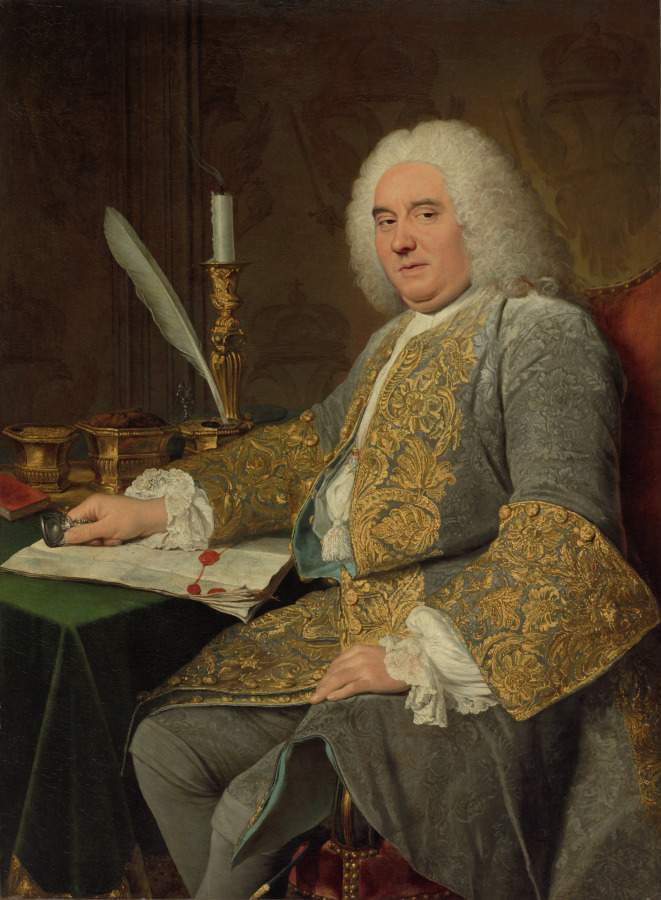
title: Portrait of Jean-Gabriel du Theil at the Signing of the Treaty of Vienna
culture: France, 18th century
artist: Jacques André Joseph Aved (French, 1702–1766)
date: 1738–40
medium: oil on canvas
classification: Painting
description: As secretary of foreign affairs for Louis XV of France, Jean-Gabriel du Theil (1685–1755) helped negotiate the 1738 Treaty of Vienna, which ceded the Duchy of Lorraine to France. The seal du Theil holds in his hand, the silver-gilt writing set, and the thick document all allude to these negotiations, while the wisp of smoke rising from the candle used to melt the sealing wax suggests that the treaty has only just concluded. Du Thiel’s relaxed posture conveys calm assurance, but his sharp gaze is that of a shrewd negotiator. A costume encrusted with gold embroidery and (just visible at his chest) the pink ribbon and star of the royal Order of Saint Lazarus, are visible manifestations of du Theil’s prestigious position.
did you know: Smoke rising from the candle suggests that du Theil has just added his molten wax seal to the document before him.